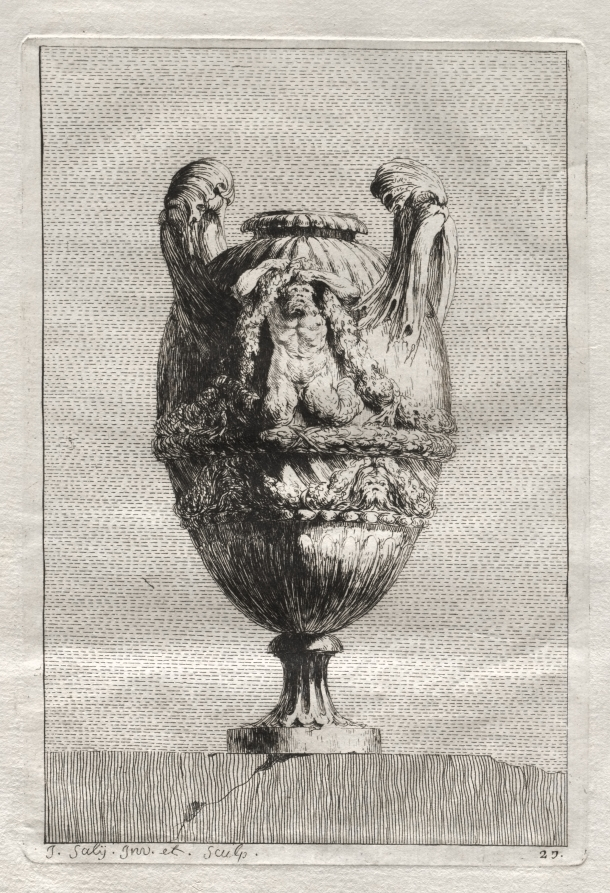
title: Suite of Vases: Plate 27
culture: France, 18th century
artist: Jacques François Saly (French, 1717–1776)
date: 1746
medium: etching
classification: Print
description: Designing ornamental vases or urns was particularly popular during the mid-18th century since the only limit to the possibilities was the imagination of the artist. Saly, a sculptor by training, was a student at the French Academy in Rome from 1740 to 1746, at which time he published a set of 30 etchings. Saly began with basic antique vase forms but deviated from classical ornament to use a rich variety of fantastic creatures for embellishment.